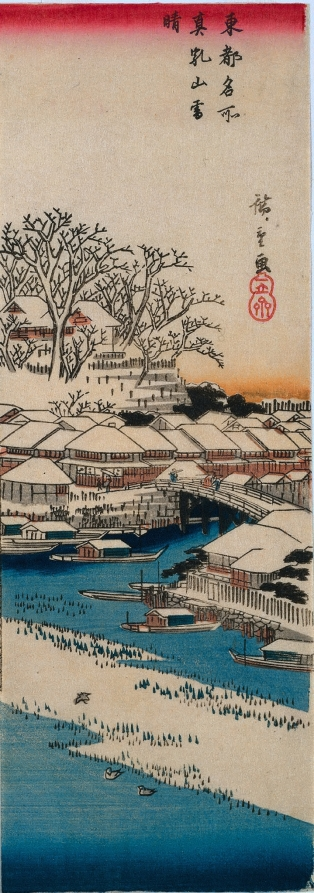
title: Clear Weather after Snow at Matsuchiyama, from the series Famous Places in the Eastern Capital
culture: Japan, Edo period (1615–1868)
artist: Utagawa Hiroshige (Japanese, 1797–1858)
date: late 1830s or early 1840s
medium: color woodblock print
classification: Print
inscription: Signature: Hiroshige ga